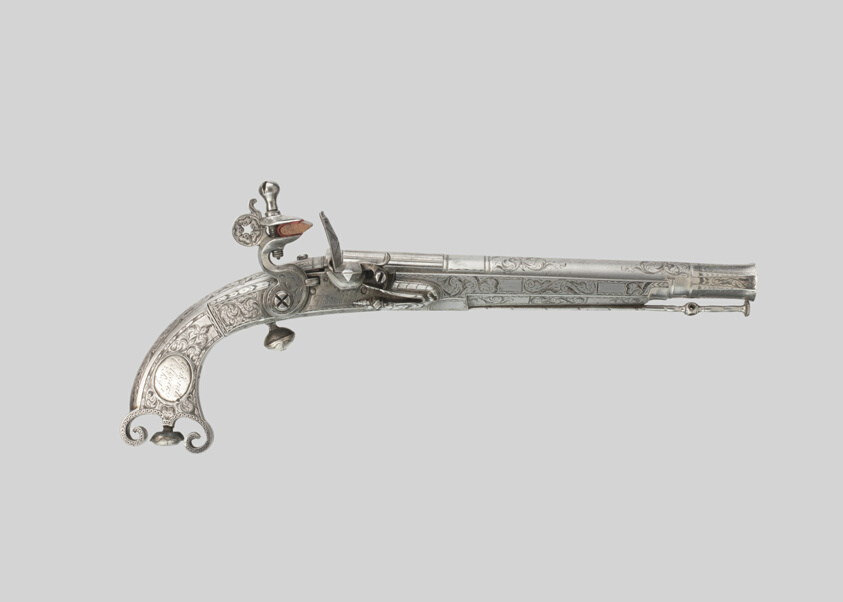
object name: Arms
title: Flintlock Belt Pistol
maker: Gunsmith: Thomas Caddell (Scottish); Doune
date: c. 1735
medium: Steel, silver, leather, and wood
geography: Scotland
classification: firearm-handgun; arms; arms and armor